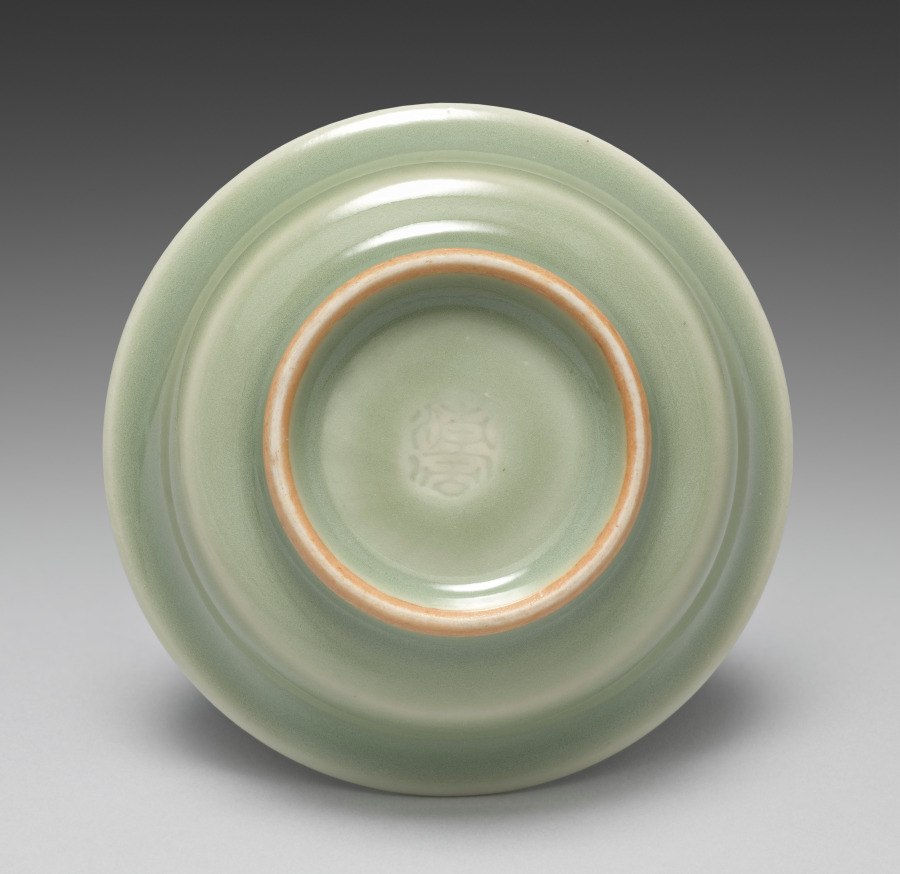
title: Saucer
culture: Japan, Meiji period (1868–1912)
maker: Seifū Yohei III (Japanese, 1851–1914)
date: 1893–1914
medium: One from a set of ten dishes; porcelain with green glaze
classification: Ceramic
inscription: 清風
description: Yohei III’s main output for his sophisticated clientele was in the form of tea sets and dining sets. He created a range of dishes in green glazes. He often produced in pairs, sets of five, or sets of ten. For this set of ten small dishes in a simple, round form that emphasizes the glaze above all, the box lid designates the piece as seiji, or green-glazed porcelain, using a general term for the extensive palette of green glazes often called celadon in English. The box lid further identifies the dishes themselves as tōchō, literally “bean-sized saucers,” a size that makes them suitable for dipping sauces.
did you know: The ten dishes in this set are stored in stacks of five in a two-compartment box.